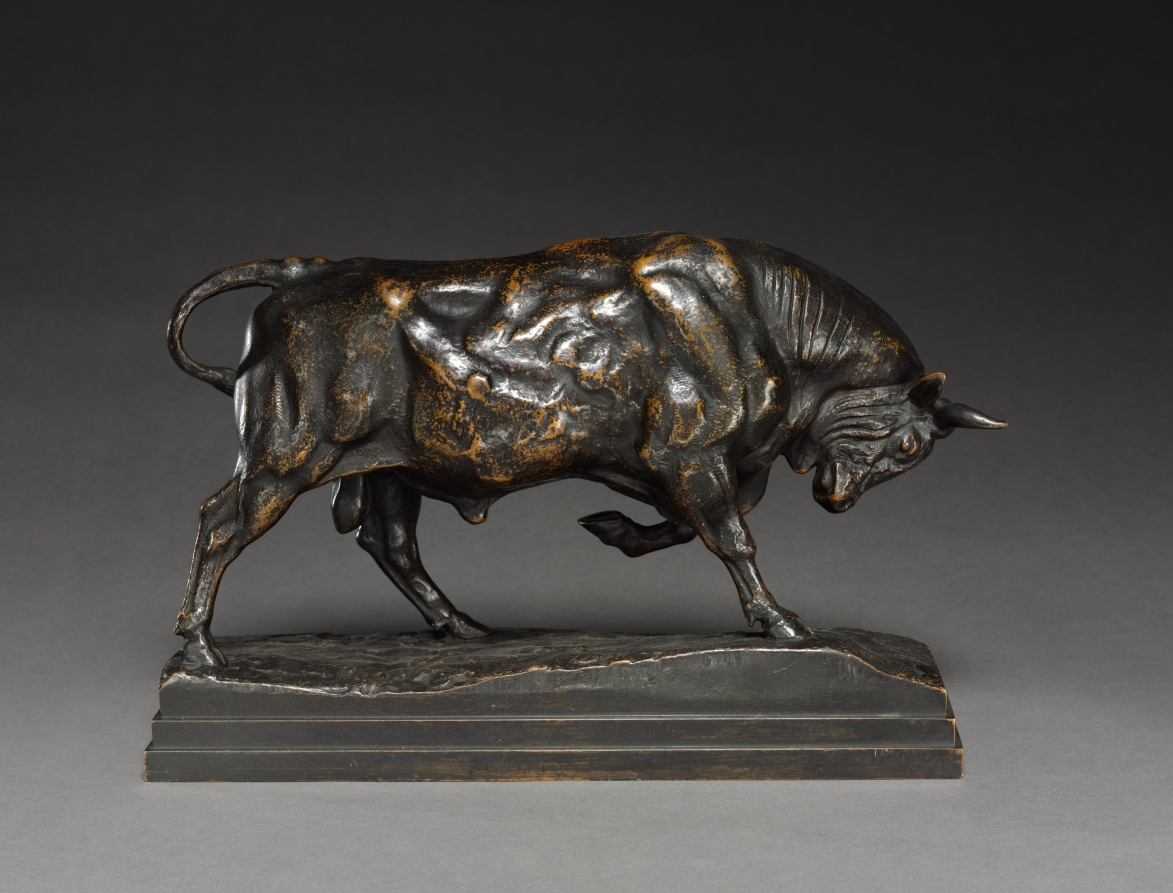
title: Bull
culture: France, 19th century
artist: Antoine-Louis Barye (French, 1796–1875)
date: c. 1841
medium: bronze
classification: Sculpture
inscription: Signed: "Barye"